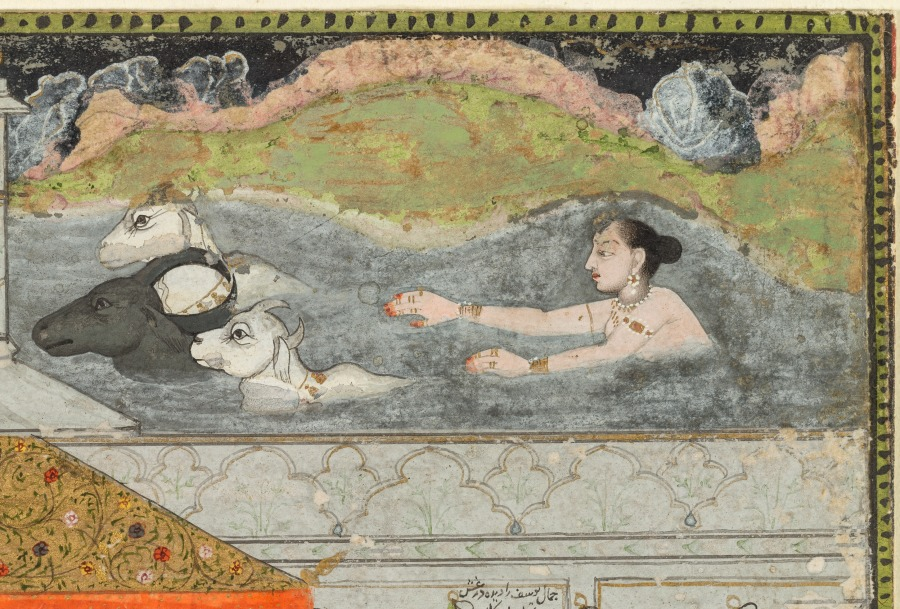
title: Lovers and beloveds: A composite of scenes from Persian, Urdu, and Sanskrit literature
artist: Chitarman II (Indian, c. 1680–с. 1750)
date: c. 1735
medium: Gum tempera and gold on paper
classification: Painting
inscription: Persian inscriptions throughout, in nasta‘liq script: Top left: The celebrated lover Ranjha; Top right, above awning: The notable ladies of the city falling into a swoon having caught sight of Joseph’s beauteous countenance; Top center, on pillar beneath canopy: The celebrated lover Vamiq; On another pillar, behind the woman’s head: The celebrated beloved ‘Azra; Upper left, on pillar: King Nala, the lover; Central figure with halo: The coming from the prison and sitting [in state] of the Lord Joseph the Prophet, with the women of the town cutting the palms of their hands and falling down unconscious; Left of center: [. . . cutting palms . . . wine cups fell from their hands . . . state of wonderment . . .]; Central pavilion at left: Sassi, the beloved the lover [Punnun]; Below central figure of Joseph: The stream of milk Shirin the beloved, weeping The death of Farhad, the lover; Lower right, in front of bearded man: Hafiz of Shiraz; Below his decanter: The stick of candy [referring to the woman with whom, according to popular lore, Hafiz was supposed to have fallen in love as a youth]; Behind the pavilion at right: Bride descending into a grave . . .; On the white railing to the left: Khwaja Bu Ali . . .; Bottom left: Queen Padmavati, the beloved, King Ratnasena, the lover; Bottom right: Majnun, the lover; On page held by Majnun: Say, “He is Allah, who is One, Allah the eternal refuge. He neither begets nor is born, Nor is there to Him any equivalent.” [Qur'an, chapter 112]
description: The figure of Joseph, identified by his halo, sits in the center near the top of this painting of heroes and heroines of ten different Persian, Urdu, and Sanskrit romances. The depicted scene occurs after Joseph has been purchased by Zulaykha in Egypt. Zulaykha, wishing to show him off to her friends and acquaintances, invites them to her home where she supplies oranges and knives. When the women see Joseph, they all are so distracted by his divine beauty that they accidentally cut their hands while peeling their oranges, but remain mesmerized by his appearance. The dramatic scene in the center is from the Persian romance of Khusrau and Shirin, in which Farhad, a stonecutter who loved Shirin, threw himself to his death from a mountaintop after hearing news of Shirin’s death, falsely sent to him from his rival Khusrau. The emaciated Majnun is in the lower right corner. Every vignette has been identified with a tiny Persian inscription.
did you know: Below the bearded poet Hafiz is the woman he loved; her name was Stick of Candy.